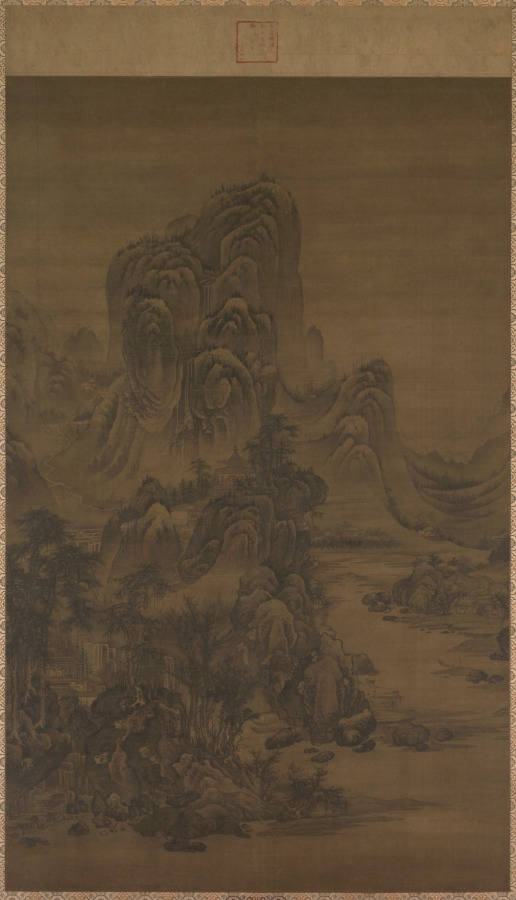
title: Landscape in the Style of Juran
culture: China, Ming dynasty (1368–1644)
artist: attributed to Liu Du (Chinese, active c. 1628-after 1653)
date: 1368–1644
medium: Hanging scroll mounted as a panel; ink and slight color on silk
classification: Painting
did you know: There is a tiny apocryphal signature under the overhanging rocks on the lower left side.